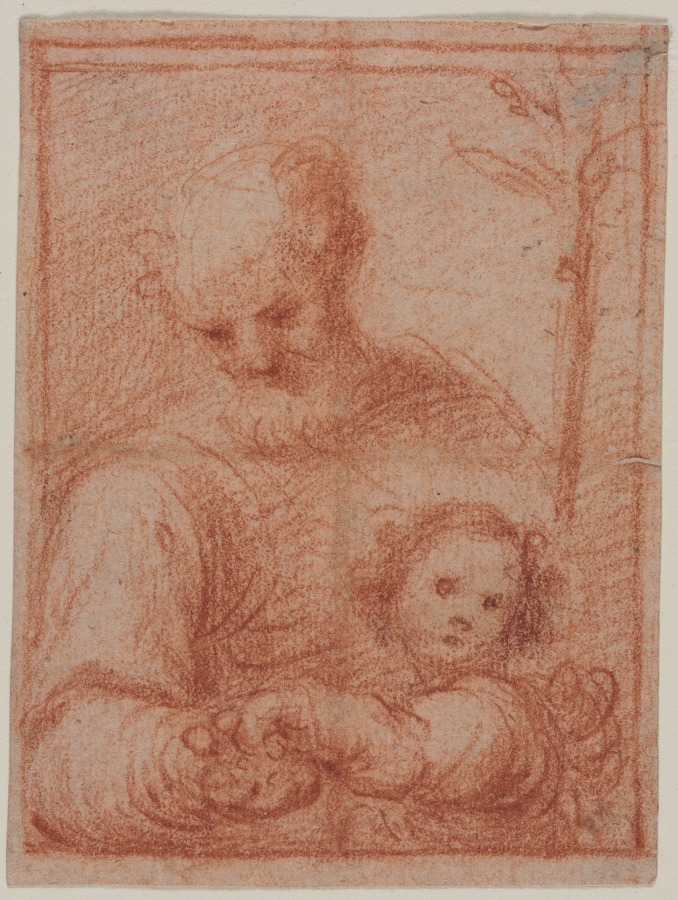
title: Joseph and Child (recto); Fragment of Two Figures (verso)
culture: Italy, 16th century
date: 16th century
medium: red chalk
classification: Drawing